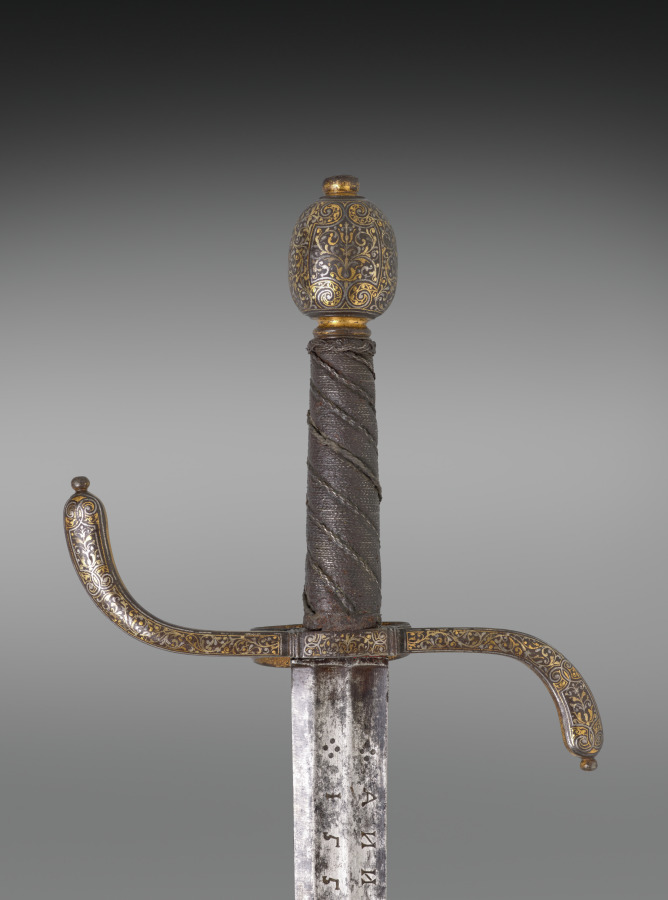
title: Hanger (Hunting Sword)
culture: Hilt: Italy (?); Blade: Germany, Saxony, late 16th-17th Century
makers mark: Jaspar Bongen the Younger (German, active late 1600s)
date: late 1600s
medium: steel; gold and silver damascened hilt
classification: Arms and Armor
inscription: "1553" (Presumed to be a commemorative date)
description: Damascening, the technique of hammering gold and silver wires into grooves cut to receive them, enlivens this sword's hilt. Further texture was added with wires to improve the user's grip, which allowed him to hunt with more control and accuracy. Hunting was a popular sport among the wealthy and many nobles owned tracts of forest, but peasants were prohibited from hunting on these lands.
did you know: The swordsmith's mark, a crowned stag visible on the blade below the hilt, is unidentified.